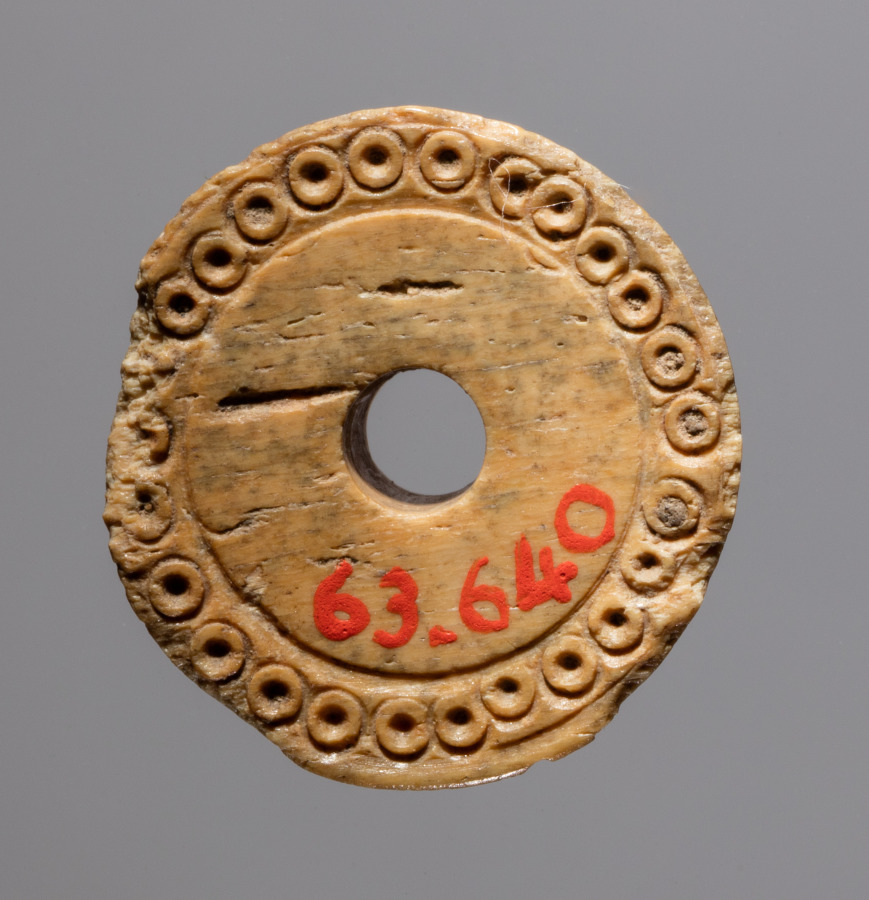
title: Spindle Whorl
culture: Iran, early Islamic period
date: 700s - 900s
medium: bone, incised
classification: Spindle Whorl